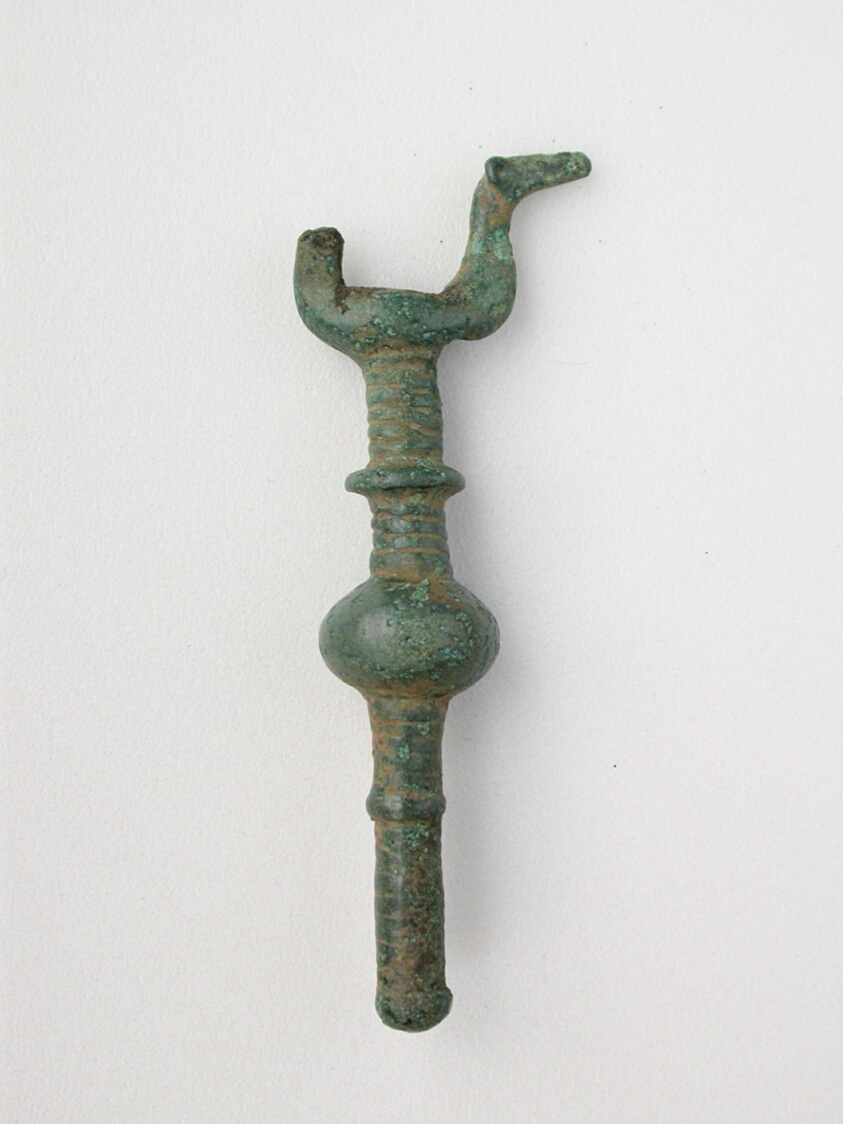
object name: Decorative Arts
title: Double Birds on Knobbed Stand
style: geometric, ancient, greek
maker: Greek; Thessaly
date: Geometric Period (800–600 BCE)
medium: Bronze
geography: Thessalía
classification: votive offering; ex-voto; decorative arts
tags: bird